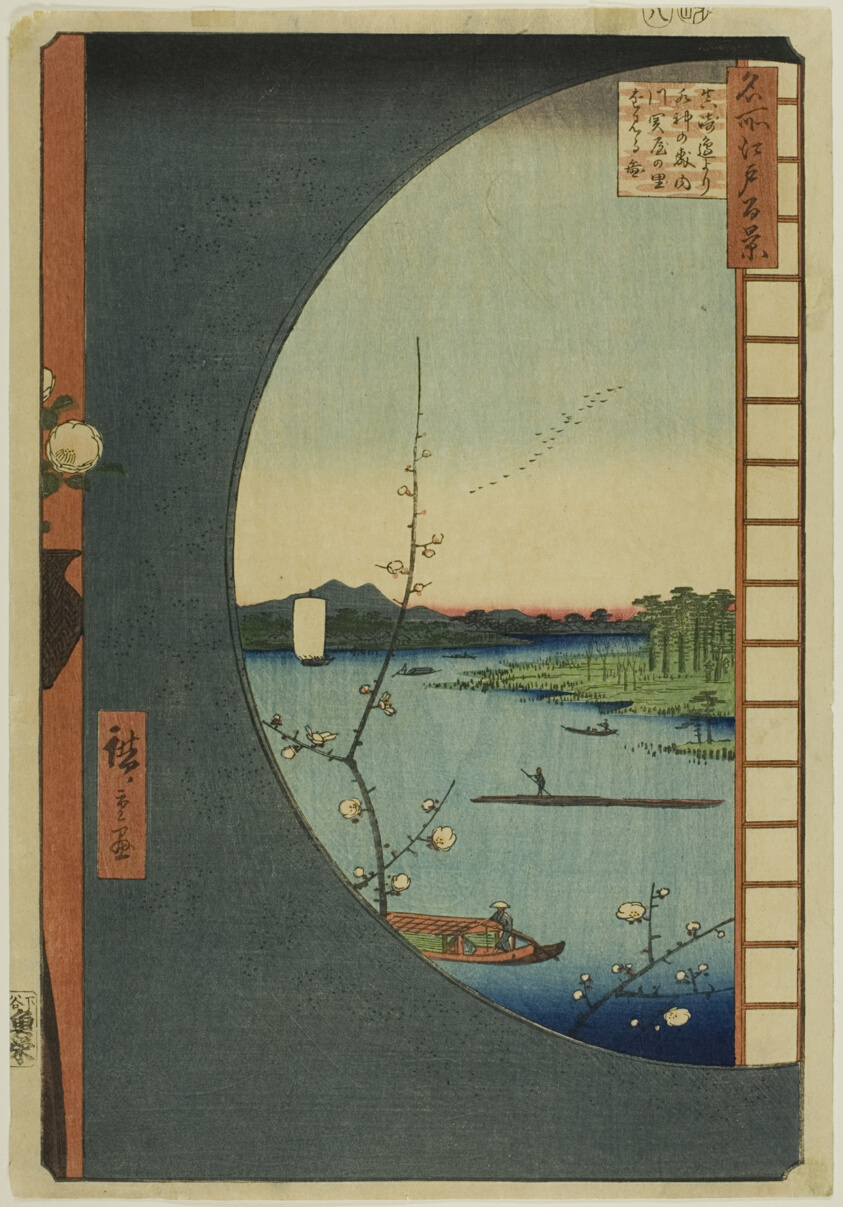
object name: Print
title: View from Massaki of Suijin Shrine, Uchigawa Inlet, and Sekiya (Massaki hen yori Suijin no mori Uchigawa Sekiya no sato o miru zu), from the series "One Hundred Famous Views of Edo (Meisho Edo hyakkei)"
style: Japanese (culture or style)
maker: Utagawa Hiroshige 歌川 広重; Japanese, 1797–1858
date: 1857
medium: Color woodblock print; oban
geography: Japan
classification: woodblock print; print